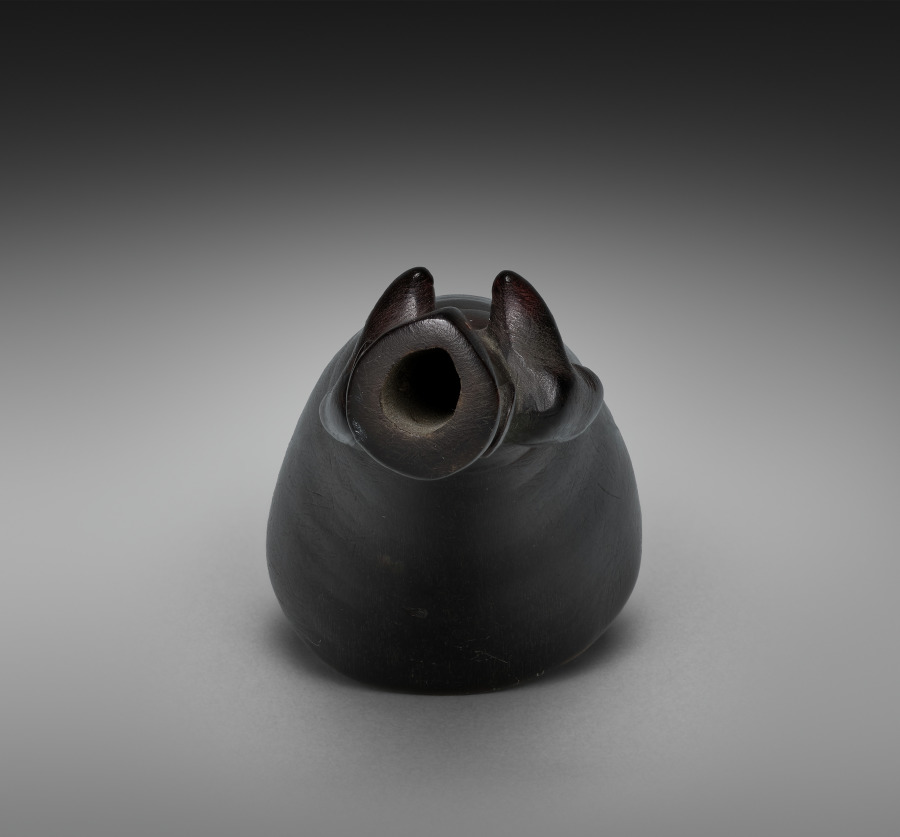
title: Snuff Container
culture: Africa, Southern Africa, Lesotho, South Sotho maker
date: 1800s-1900s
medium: Horn and wood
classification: Vessels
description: This snuff container in the form of a human (female) figure was carved from cattle horn. The form of the image follows the curve of the horn, with arms and hands held to the chest. Despite its smallish size and minimalist execution, this object demonstrates considerable expressive power. Cattle had special meaning for the pastoralist peoples of southern Africa in that it stood for the wealth and status of the individual and the group. However, similar to the ideas associated with tobacco and snuff, cattle also referred to the world of the ancestors. Snuff containers like this one had great significance for their owners and users.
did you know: The tobacco product snuff was stored in decorative, yet useful, containers like this one.